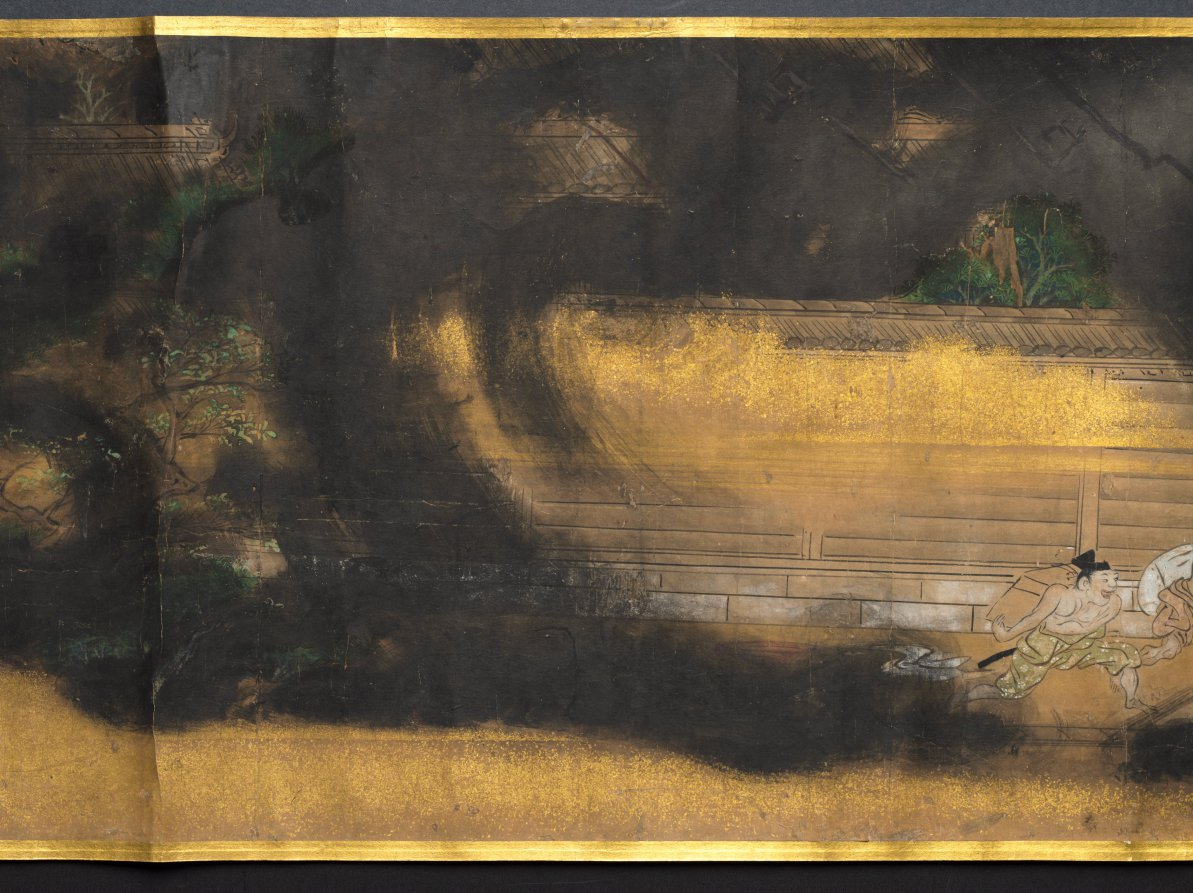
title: People Fleeing from a Fire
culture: Japan, Edo period (1615–1868)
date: 1615–1868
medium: Handscroll; color and gold on paper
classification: Painting